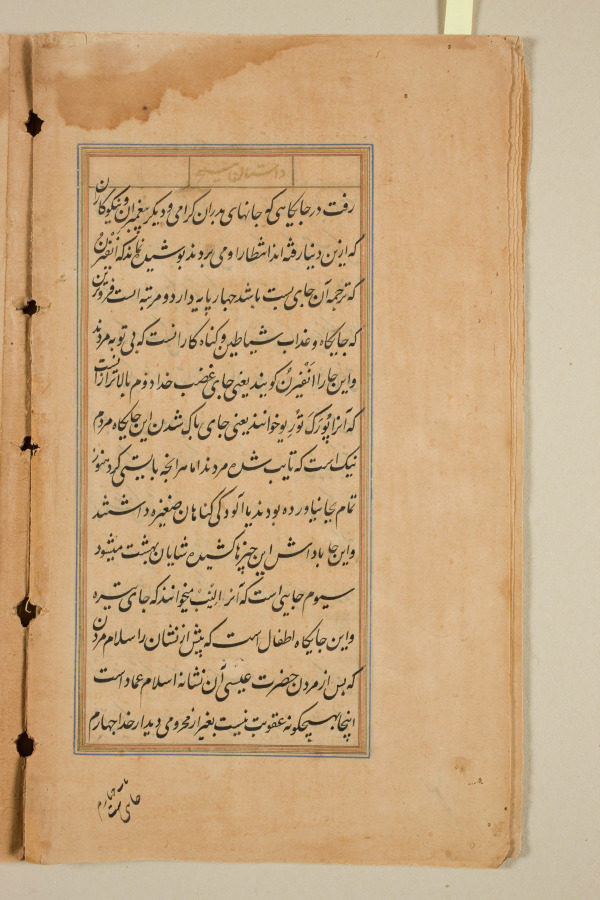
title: Text page from a Mirror of Holiness (Mir’at al-quds) of Father Jerome Xavier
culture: Mughal India, Allahabad, made for Prince Salim (1569–1627)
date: 1602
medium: Ink and gold on paper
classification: Manuscript